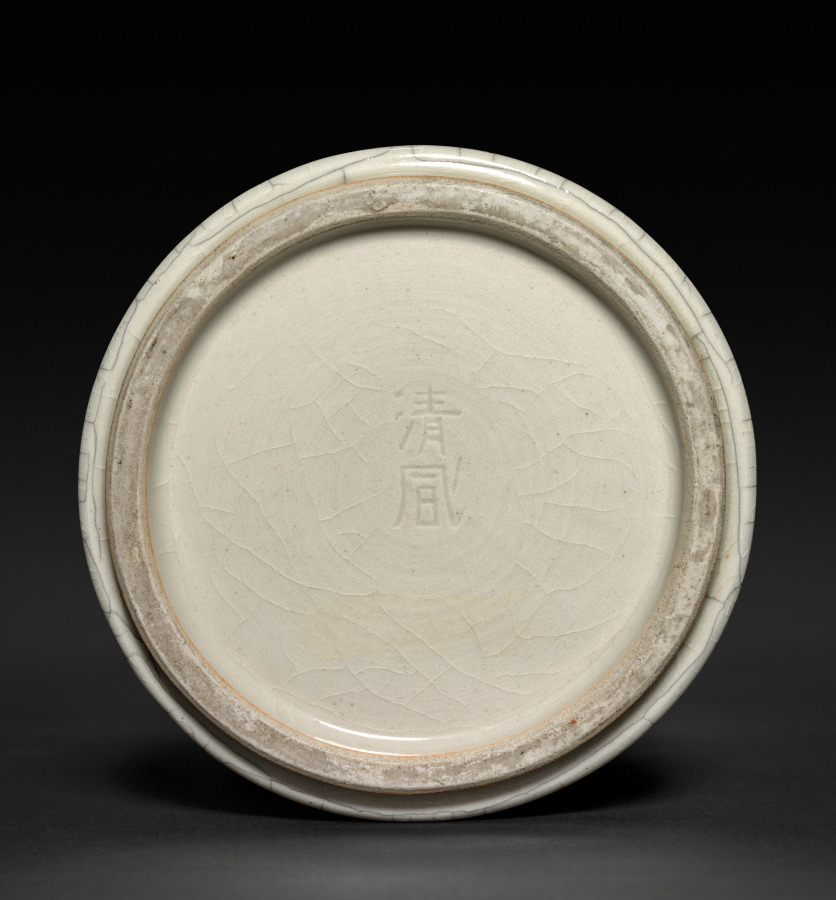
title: Gu-shaped Vase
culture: Japan, Meiji period (1868–1912)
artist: Seifū Yohei III (Japanese, 1851–1914)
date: 1912–14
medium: Porcelain with crackled glaze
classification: Ceramic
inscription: 清風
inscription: 清風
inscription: 帝室技芸員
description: Seifū Yohei III mined the repertoire of Chinese vessel types, from ceramics modeled after ancient ritual bronzes to shapes developed in the Yuan (1279–1368) and Ming (1368–1644) dynasties. His designs tended to be formal and restrained, often featuring creamy white glazes suggestive of the hue of Ding ware and green glazes resembling Longquan ware. This gu-shaped vase has a cracked-ice glaze, which was once customarily called Ge (Japanese pronunciation Ka), after the kiln where it purportedly originated during the Southern Song dynasty (1127–1279). The glaze’s double-crackle pattern, featuring both deeper and shallower cracks, is called “gold threads and iron lines.” The effect was enhanced here by coating the vessel with ink or another stain, which was allowed to seep into the cracks before the surface was wiped clean.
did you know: Gu-shaped vases are relatively slender cylinders that flare at both the mouth and foot with orbs or drumlike forms partway up the vessel.